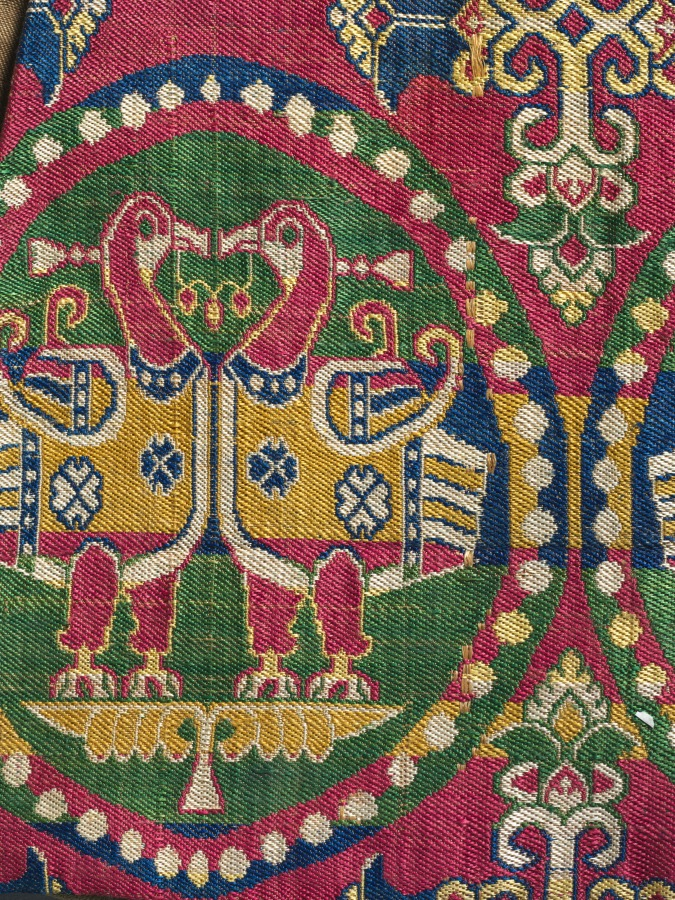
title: Child’s Coat with Ducks in Pearl Medallions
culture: Probably Sogdia (present-day Uzbekistan); China, Tang dynasty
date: 700s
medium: Silk: weft-faced compound twill weave (samite)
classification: Garment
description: The coat’s outer fabric is woven in five brilliant colors featuring paired ducks in pearl roundels, hallmarks of the precious and highly desired silks from Sogdia. The coat’s inner lining is a twill damask with a floral pattern made in China. The combination of Sogdian and Chinese silks in one garment with Tibetan ownership history is evidence of the vital exchange and cultural interaction among the peoples living along the trade routes of the Silk Road. This precious coat was presumably made for a Tibetan prince. Given the coat’s pristine condition, though, it is unclear whether the garment was ever worn, or was used as a diplomatic gift or perhaps as currency.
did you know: This coat is part of a set of garments that originally included an outer pair of pants and silk boots made from the same fabric.